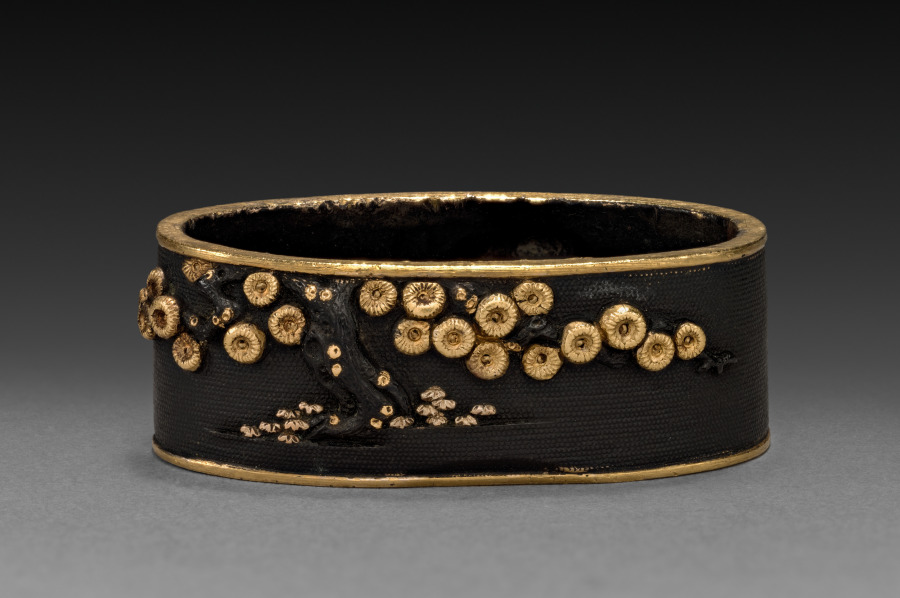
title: Sword-Hilt Collar (Fuchi)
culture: Japan, Edo period (1615–1868)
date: 1700–1850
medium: shakudo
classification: Arms and Armor